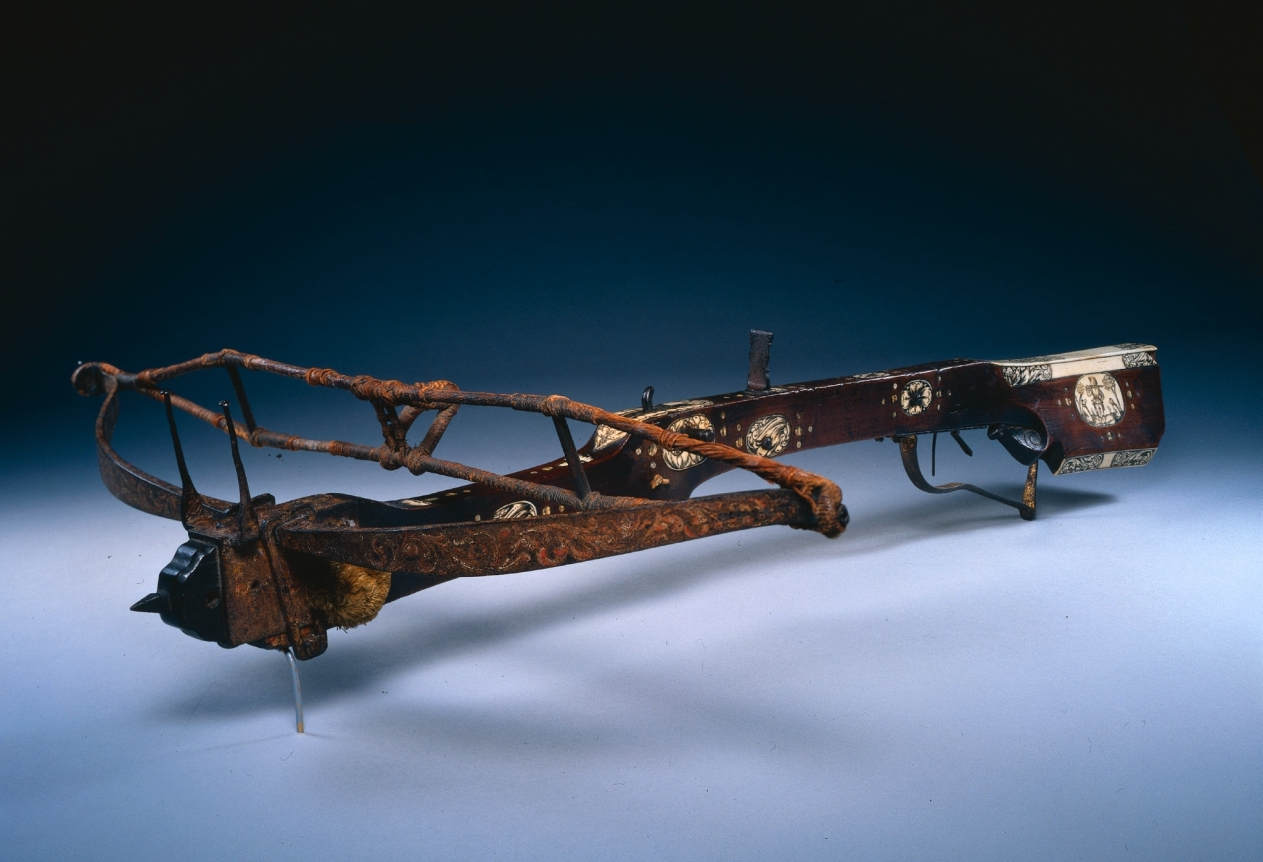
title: Pellet Crossbow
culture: Germany (?)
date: 1600s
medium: wood, inlaid with stag horn; flax cord; steel with traces of paint and gilding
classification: Arms and Armor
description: This ornate pellet crossbow is designed to fire molded clay pellets or small rocks, giving it the name stonebow. The bow is hand drawn and used for hunting small game.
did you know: This is a custom-made crossbow combining popular Italian and German designs of the 1600s.